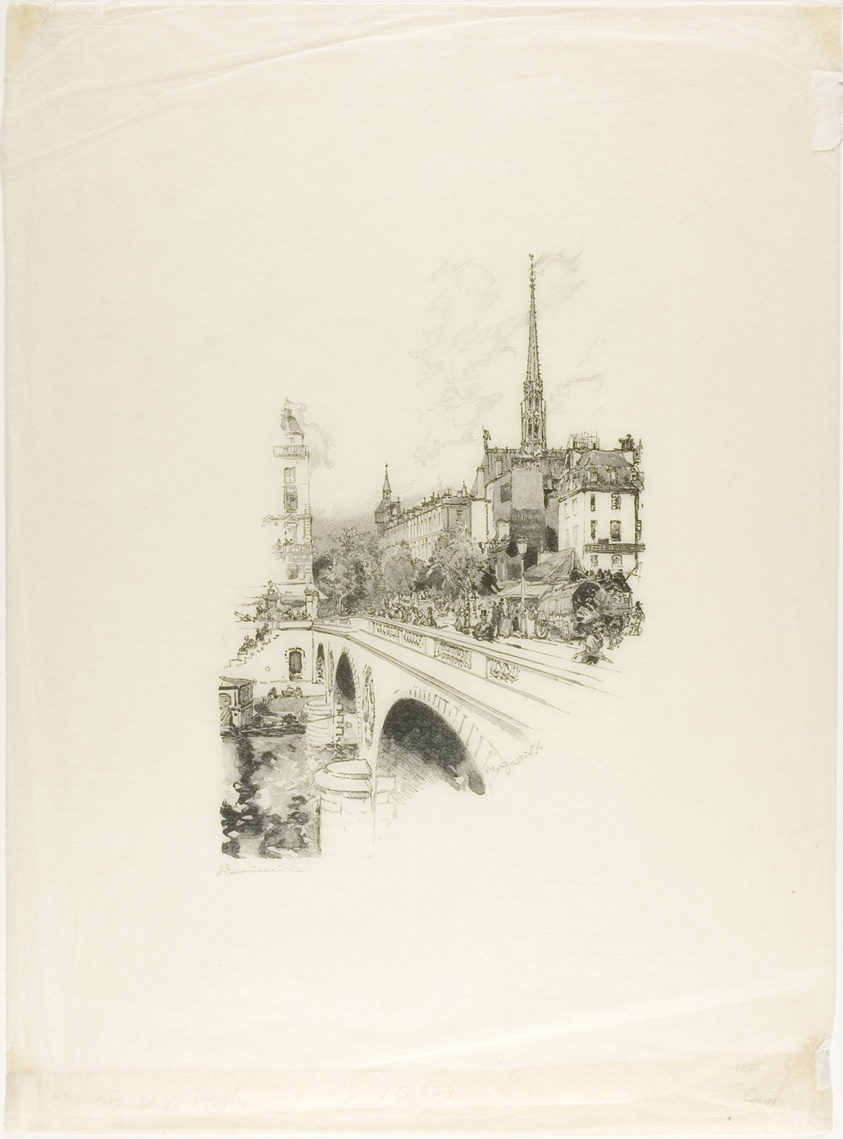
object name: Print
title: Le Pont Saint-Michel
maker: Louis Auguste Lepère (French, 1849-1918)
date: 1890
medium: Wood engraving in black on cream laid Japanese tissue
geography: France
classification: wood engraving; print; prints and drawing